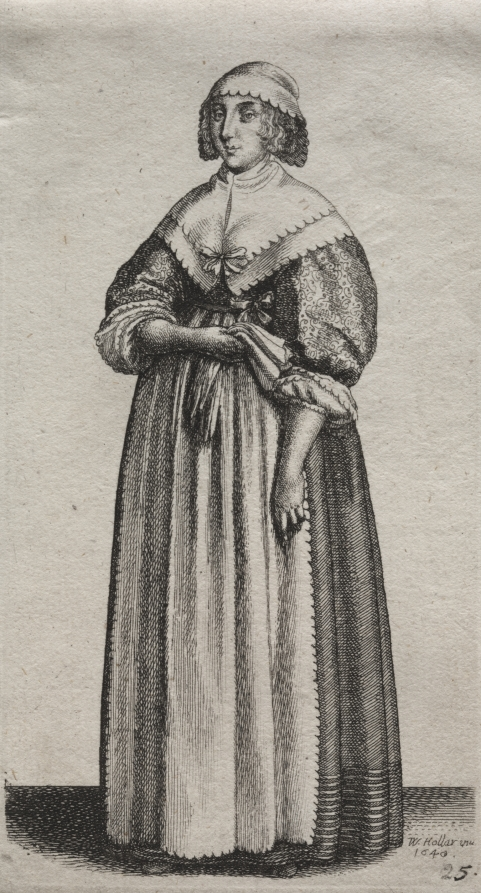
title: The Several Habits of English Women, from the Nobility to the Country Women as they are in these times: The Woman with Gloves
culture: Bohemia, 17th century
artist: Wenceslaus Hollar (Bohemian, 1607–1677)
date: 1640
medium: etching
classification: Print